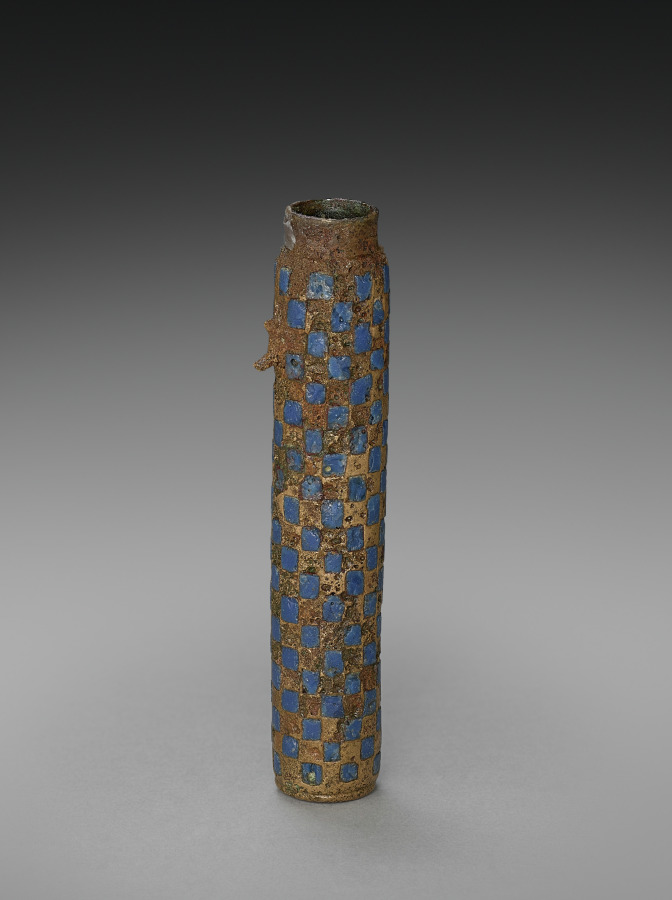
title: Kohl Tube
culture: Egypt, Greco-Roman period (332 BCE–395 CE), Ptolemaic dynasty (305–30 BCE)–Roman empire (30 BCE–395 CE)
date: 305 BCE–395 CE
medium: brass with blue enamel decoration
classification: Cosmetic Objects